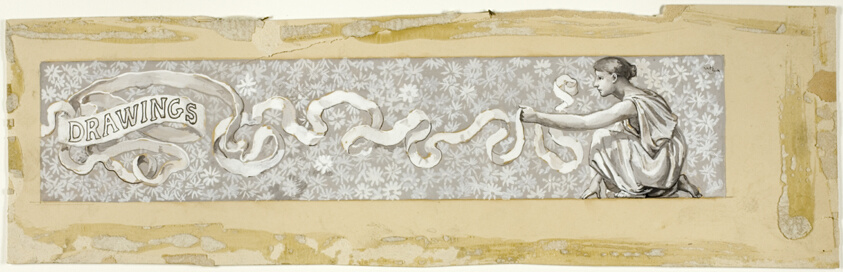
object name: Drawing and Watercolor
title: Head-Piece to List of Drawings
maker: Will Hicock Low (American, 1853-1932)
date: 1885/88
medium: Gray, black and white gouache on tan wove card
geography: United States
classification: gouache; drawings (visual works); prints and drawing